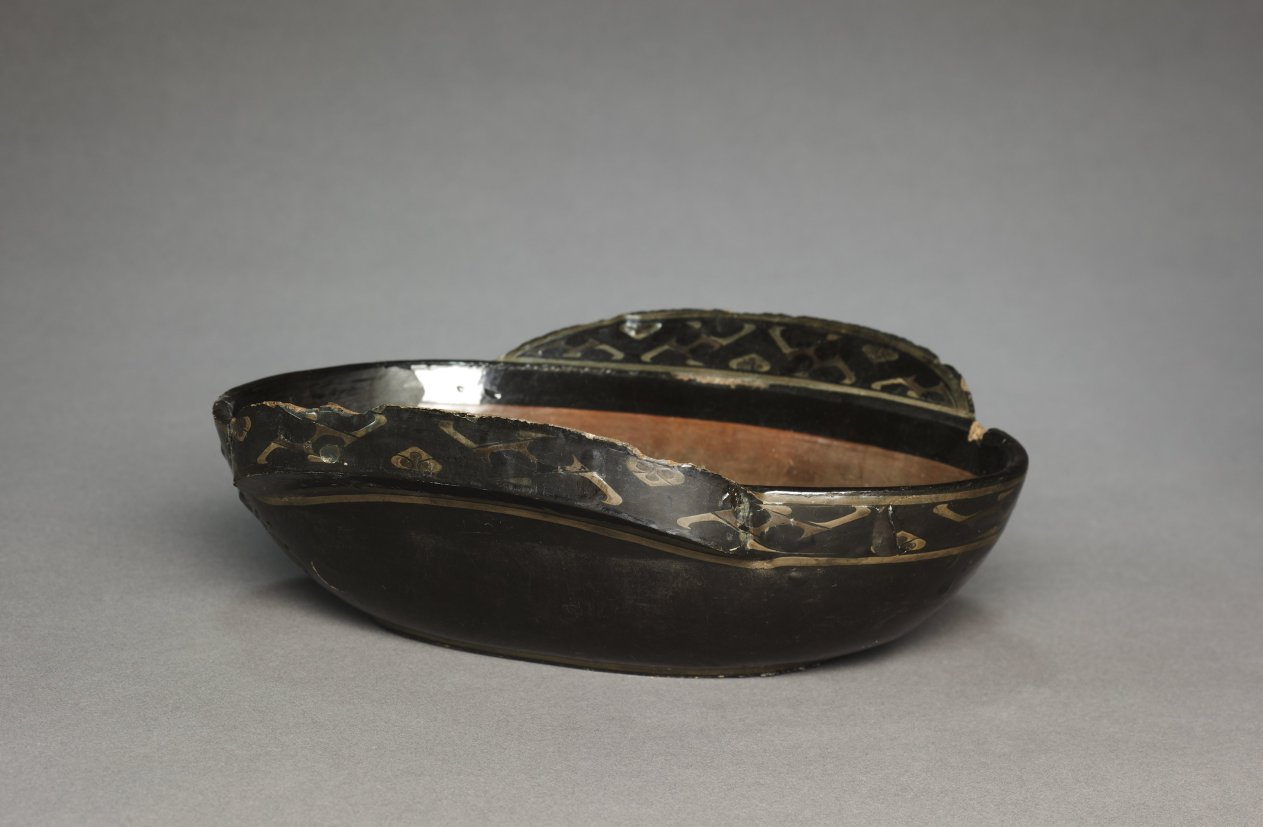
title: Winged Cup (Erbei)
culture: China, Western Han dynasty (206 BCE–8 CE)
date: c. 206–100 BCE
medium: lacquer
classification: Lacquer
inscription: inscribed: Taiguan